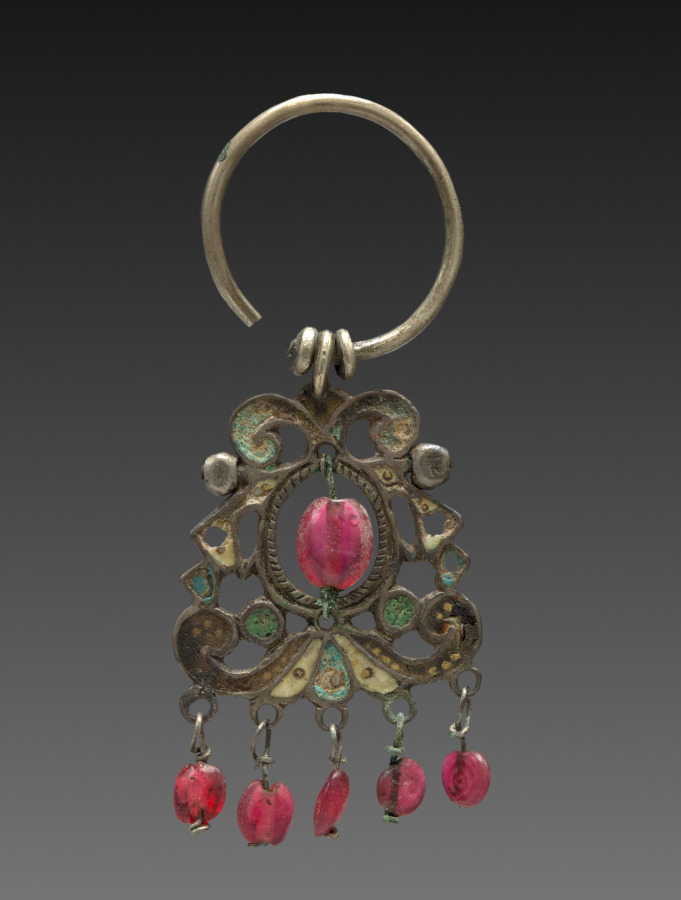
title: Earring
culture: Russia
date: 1800s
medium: silver, enamel, and red glass beads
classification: Jewelry